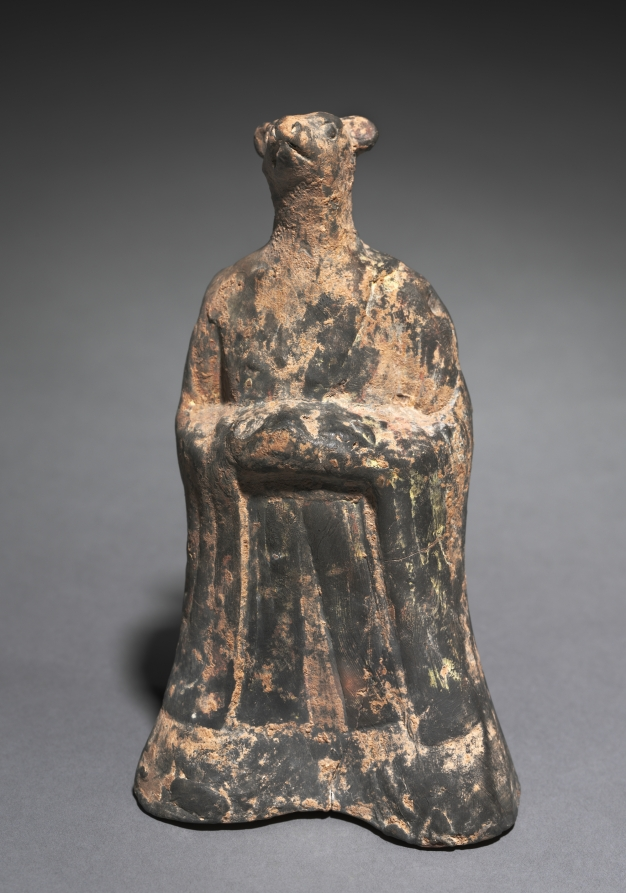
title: Mortuary Figure of the Zodiac Sign: Tiger (Gemini)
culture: China, Northern Wei dynasty (386-534)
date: 500s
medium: gray earthenware with traces of slip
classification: Sculpture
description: The twelve-animal zodiac series—rat, ox, tiger, rabbit, dragon, snake, horse, goat, monkey, rooster, dog, and boar—signifies a traditional Chinese concept of time structured in a cyclical order. The twelve animals are also linked to the art of fortune-telling that underlies human existence in connection with the changes of the universe. The use of the twelve zodiac animals as tomb furniture suggests they provided a cosmological structure for the afterlife.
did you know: The exterior surface was originally painted with a red, yellow, and brown slip over an overall layer of white slip.